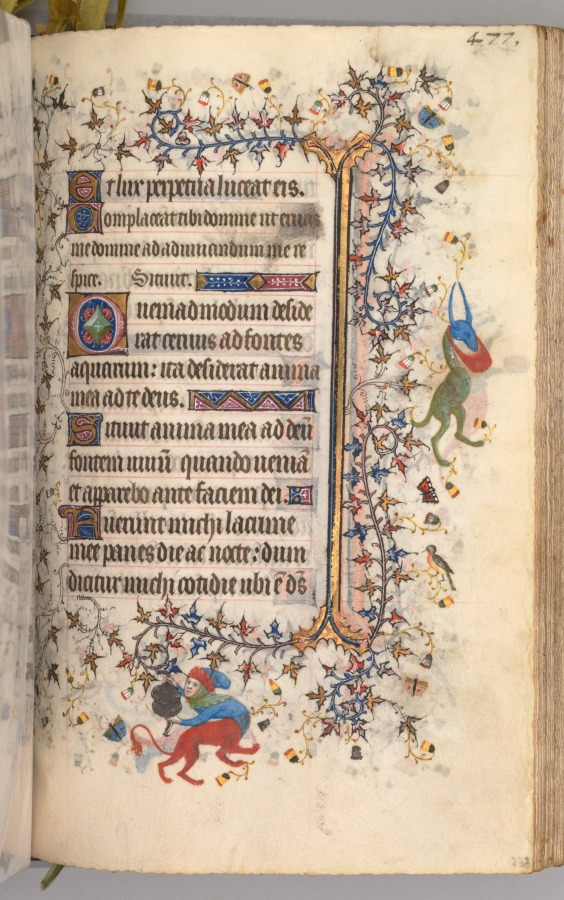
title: Hours of Charles the Noble, King of Navarre (1361-1425): fol. 233r, Text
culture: France, Paris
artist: Master of the Brussels Initials and Associates (French)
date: c. 1405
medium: ink, tempera, and gold on vellum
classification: Bound Volume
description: This precious volume was obviously highly prized by its owner, the French-born King of Navarre, who had his coat of arms painted on no less than twenty folios. Rather than directly commissioning this manuscript from a specific workshop, it seems that Charles the Noble acquired his book of hours -- perhaps ready-made for the luxury market -- while on a trip to Paris in 1404-05. A collaborative effort, six painting styles are evidenced within the pages of this codex, those of two Italians, two Frenchmen, and two Netherlanders. The painter who was responsible for the planning and decoration of the book, and who produced seventeen of the large miniatures, was a Bolognese artist known as the Master of the Brussels Initials. His principal assistant, responsible for most of the borders, was a Florentine who signed his name "Zecho" da Firenze on folio 208 verso.